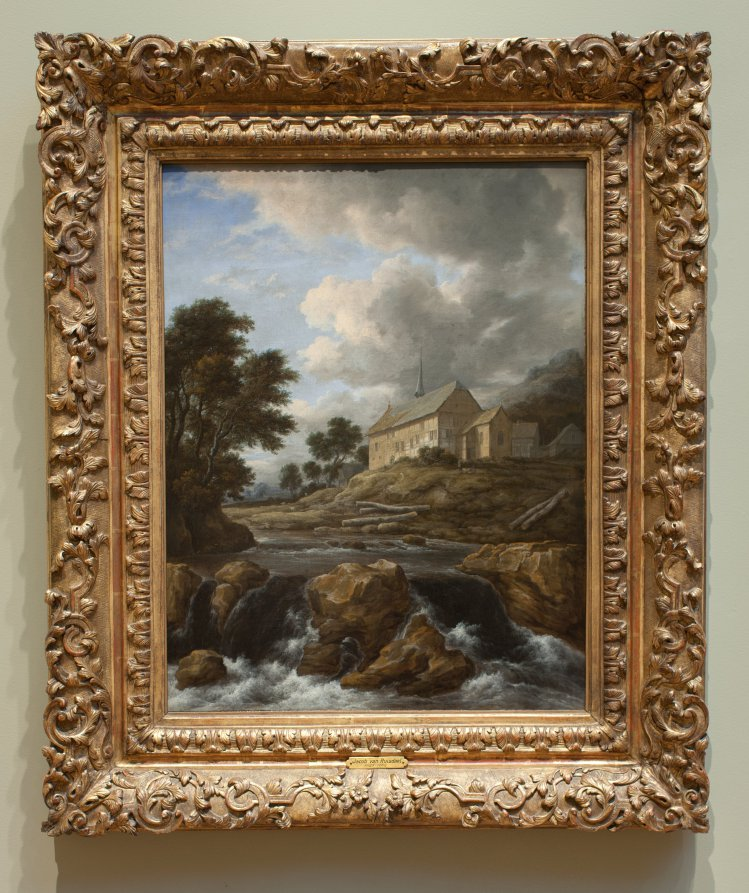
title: Landscape with a Church by a Torrent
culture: Netherlands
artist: Jacob van Ruisdael (Dutch, 1628/29–1682)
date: c. 1670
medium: oil on canvas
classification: Painting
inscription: Signed lower right: JvRuisdael [JvR in monogram]"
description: It is not known if Ruisdael considered his paintings to be social or moral commentary, for no documents from his lifetime indicate how the artist or his patrons interpreted the works. But in this painting dangerous rapids block access to the chapel, and severed logs litter the middleground, hinting at life’s transience and the challenge to reach salvation.